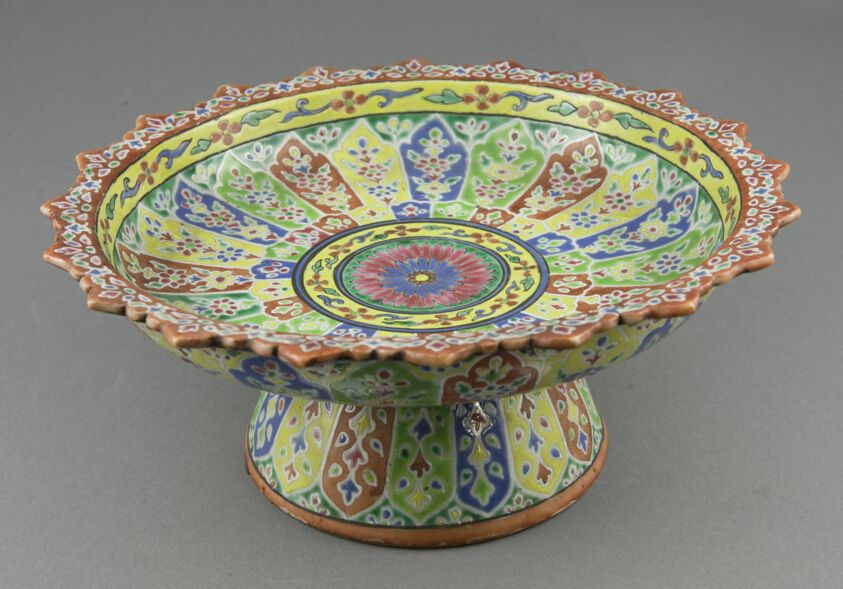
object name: Decorative Arts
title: Bencharong (Five-Colored) Ware, Footed Stem Plate with Foliate Rim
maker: China, for the Thai Market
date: 19th century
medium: Porcelain painted in overglaze polychrome enamels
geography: China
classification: porcelain; asian art; ceramics; decorative arts